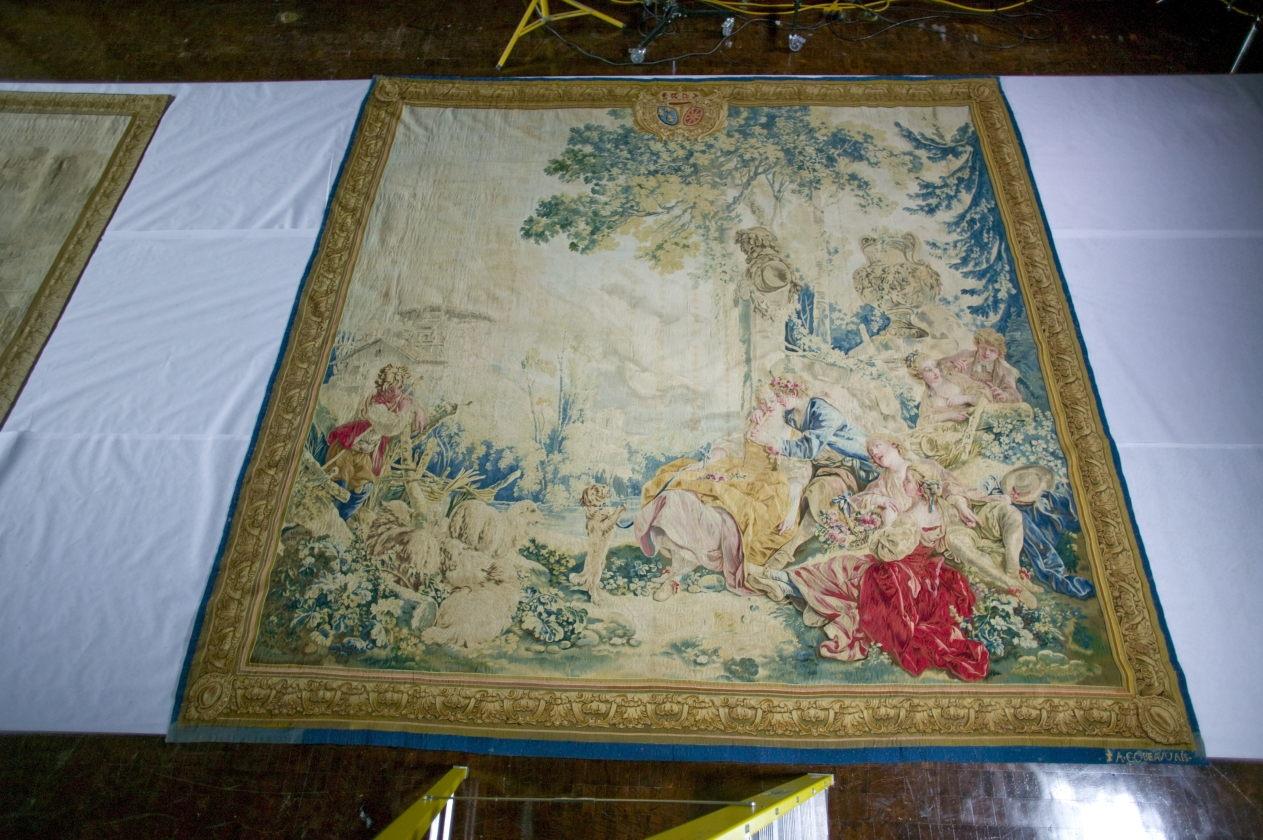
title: The Flute Player from Set Les Beaux Pastorales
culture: France, 18th century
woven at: Beauvais (French)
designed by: François Boucher (French, 1703–1770)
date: 1775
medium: tapestry weave: silk and wool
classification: Tapestry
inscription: signed in reverse in lower left hand corner: "F. Boucher 1775"; on lower right hand selvage fleur-de-lys and "A.C.C. Beauvais."